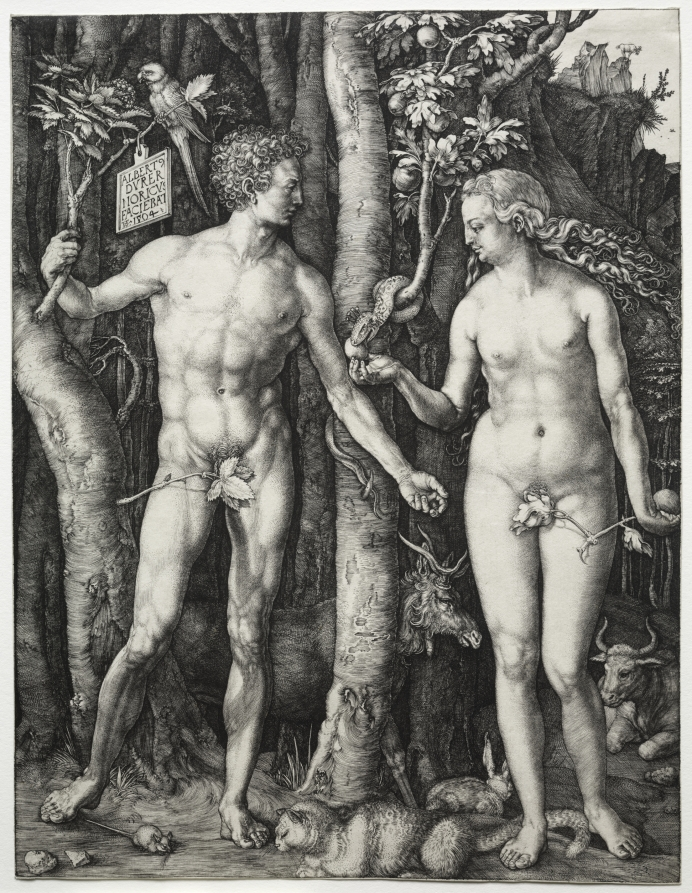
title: Adam and Eve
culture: Germany, early 16th Century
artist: Albrecht Dürer (German, 1471–1528)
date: 1504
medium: engraving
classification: Print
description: Albrecht Dürer’s iconic engraving was hugely impactful to the spread of natural symbolism in Europe. Drawing upon Classical sculptural models, he represented Adam and Eve in perfect, uncorrupted beauty moments before tasting the forbidden fruit. The tree of knowledge, with its writhing serpent, is a fig tree, and the tree of life, which Adam clasps, a mountain ash, native to Northern Europe. The elk, rabbit, cat, and ox are symbols of the four human temperaments—melancholic (gloomy), sanguine (sensual), choleric (cruel), and phlegmatic (slothful)—in perfect balance. But the cat and mouse hint at aggression to come, and the parrot, appearing like a beacon in the dark northern forest, heralds the promise of the Virgin Mary (the new Eve).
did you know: Albrecht Dürer set the Garden of Eden in a northern forest, with the tree of knowledge represented by a fig tree and the tree of life, a mountain ash.